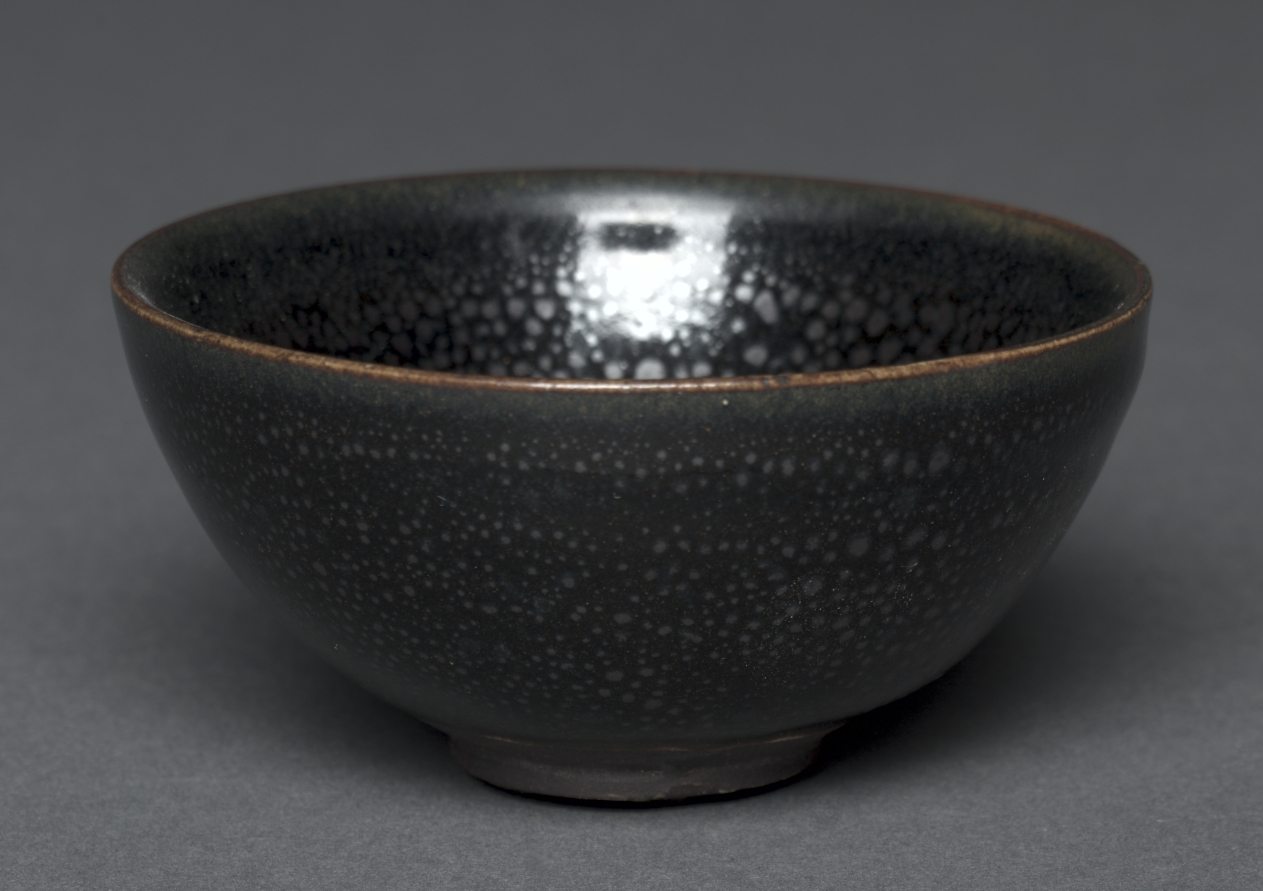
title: Tea Bowl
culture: Northern China, Henan province, Northern Song dynasty (960-1127) or Jin dynasty (1115-1234)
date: 1100–1200s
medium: stoneware with "oil spot" glaze, black ware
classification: Ceramic